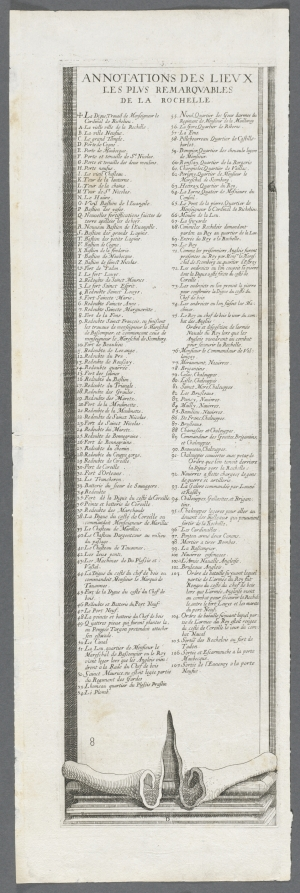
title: The Siege of La Rochelle: Plate 9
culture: France, 17th century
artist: assistant of Jacques Callot (French, 1592–1635)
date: 1628–1630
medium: etching and engraving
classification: Print